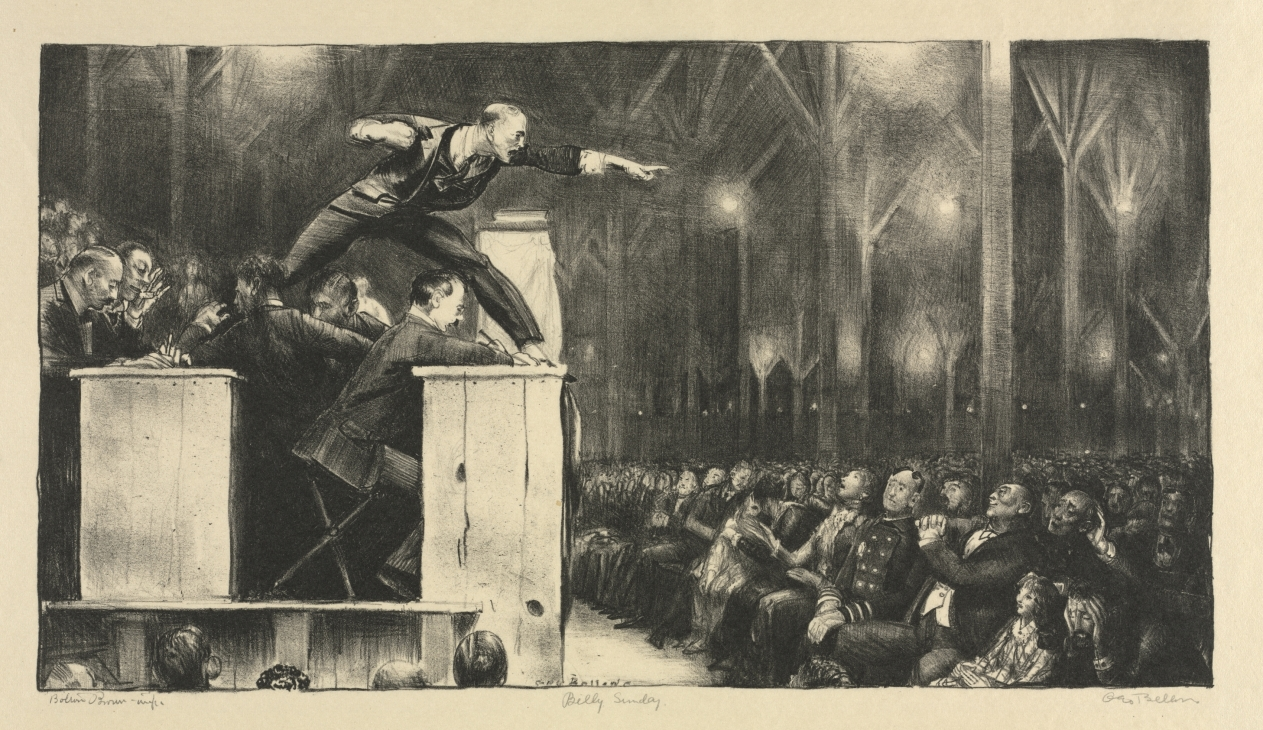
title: Billy Sunday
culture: America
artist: George Bellows (American, 1882–1925)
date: 1923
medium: lithograph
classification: Print